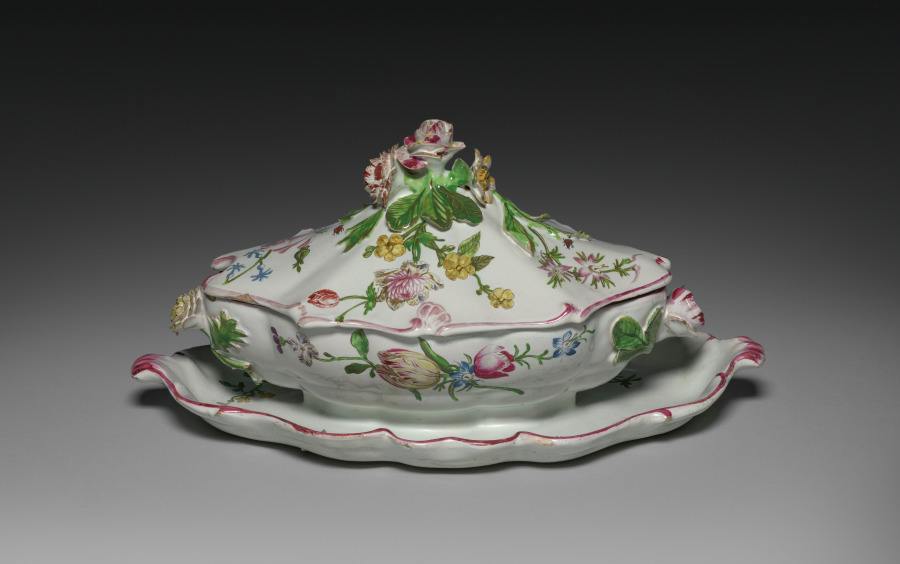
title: Covered Sauce Tureen with Attached Stand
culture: France, Marseilles, 18th century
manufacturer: Veuve Perrin Factory (French)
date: c. 1765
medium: tin-glazed earthenware (faience) with enamel decoration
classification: Ceramic